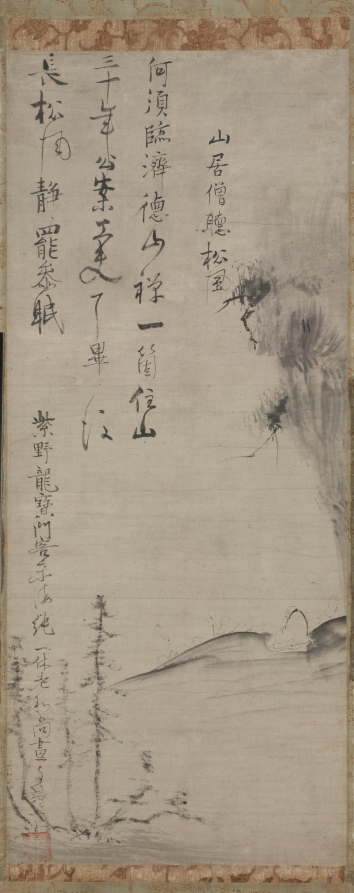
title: Listening to the Wind in the Pines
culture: Japan, Muromachi period (1392–1573)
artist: Ikkyū Sōjun (Japanese, 1394–1481)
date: 1400s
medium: hanging scroll; ink on paper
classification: Painting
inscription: 山居僧聴松風/何須臨済徳山禅一箇住山/三十年公案工夫了畢後/長松風静罷参眠 (transcribed by Trevor Menders with Zheng Xiaoying 2017, revised by Osvaldo Mercuri 2021)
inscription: 紫野龍寶門客东海純一休老和尚畫と詩一筆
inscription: 落款 一休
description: A monk sits in contemplation below an overhang covered with pine. The poem, titled "Monk in the Mountains Listening to the Wind in the Pines," refers to two Chinese Chan (Zen) Buddhist monks active in the ninth century. It may be translated as follows: Why must the Zen of Rinzai (Linji Yixuan) and Tokusan (Deshan Xuanjian) reside in a single temple for thirty years? Once he's solved his kōan, (the monk) ends his practice and falls asleep in the quietness of the wind among the tall pines. (translated by Osvaldo Mercuri) According to an inscription following the poem, both painting and verse were done by an eminent Japanese Buddhist monk known for revitalizing the Kyoto temple Daitokuji.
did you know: The word mountain, appearing in the title to the poem on this painting, can also refer to a temple.